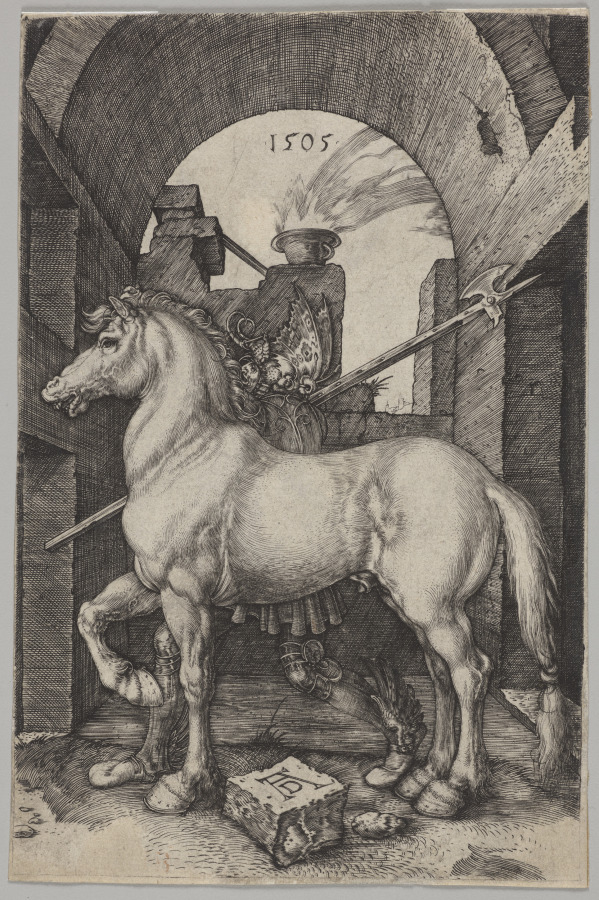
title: The Small Horse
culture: Germany, early 16th Century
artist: Albrecht Dürer (German, 1471–1528)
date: 1505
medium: engraving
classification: Print